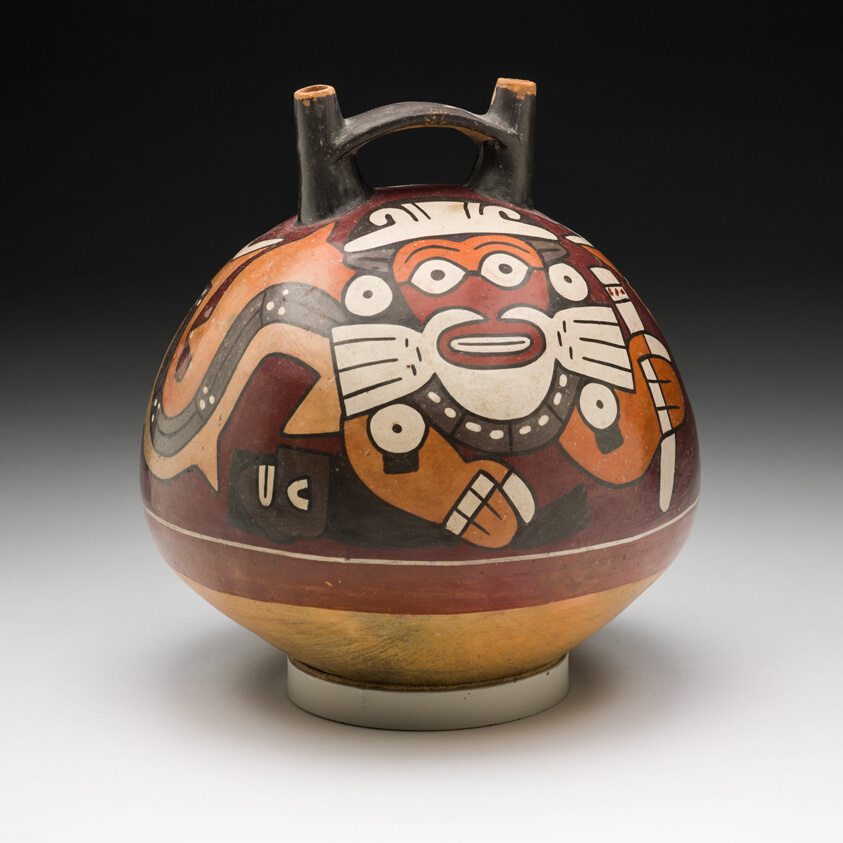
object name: Vessel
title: Vessel with Marine Beings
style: nazca, early intermediate period, Pre-Columbian, americas, andes, Arts of the Americas, andean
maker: Nazca; South coast, Peru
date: 50–500 CE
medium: Ceramic and pigment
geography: Peruvian South Coast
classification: earthenware; art of the americas; ceramics; vessel; masks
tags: people, animals, composite, fish, sacrifice, warriors, costumes, masks